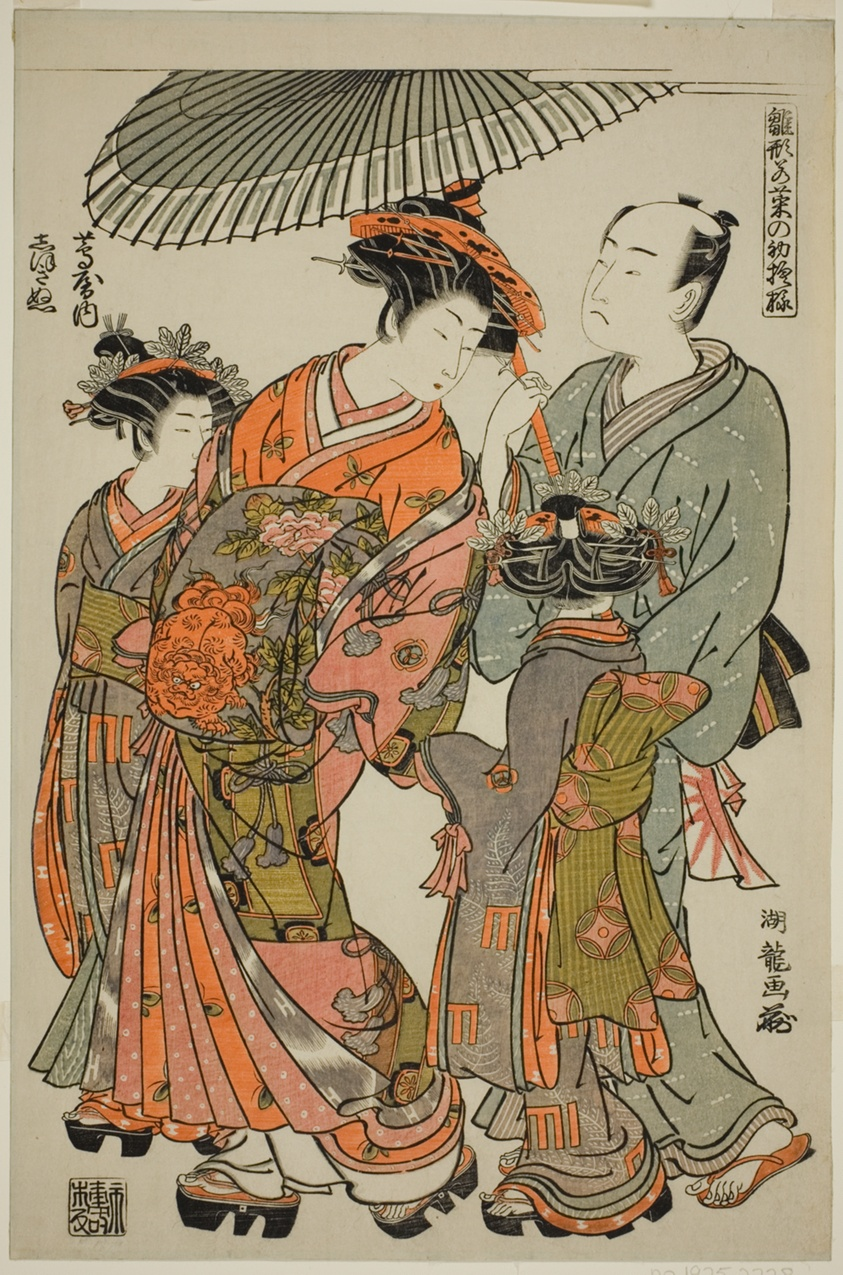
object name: Print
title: Shioginu of the Tsutaya, from the series "Models for Fashion: New Designs as Fresh as Young Leaves (Hinagata wakana no hatsu moyo)"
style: Japanese (culture or style)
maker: Isoda Koryusai (Japanese, 1735-1790)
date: c. 1777/78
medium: Color woodblock print; oban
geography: Japan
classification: woodblock print; print; asian art